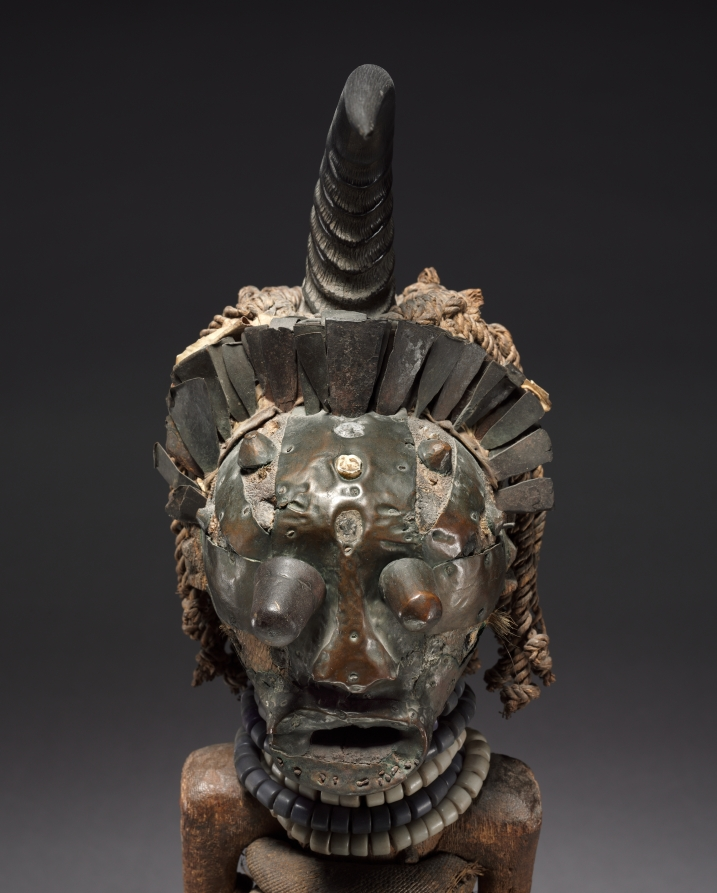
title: Male Figure (nkishi)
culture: Africa, Central Africa, Democratic Republic of Congo, Songye-style carver and nganga (priest)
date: late 1800s–early 1900s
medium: Wood, glass beads, brass (including upholstery studs), copper alloy, iron alloy, raffia, reedbuck antelope horn, rawhide, animal hair, human teeth, organic material, minerals, and plant fibers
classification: Sculpture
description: This figure's visual impact and workmanship suggest that an extended family––rather than an individual––used it. The raffia skirt around the waist and the blue and white beads are indicators of leadership. The metal appliqué covering the face and the metal blades that hedge the headgear refer to the blacksmith, a culture hero celebrated in a Songye myth narrating the formation of the state. The metal strips on the skeletal face are said to relate to lightning, signaling the figure's role as a powerful anti-sorcerer, but the contrast between white iron and red copper symbolically alludes to the ambivalent powers of the figure.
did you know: Researchers conducted X-ray scanning on this figure, revealing its internal structure and human teeth, an antelope horn, and animal hair.